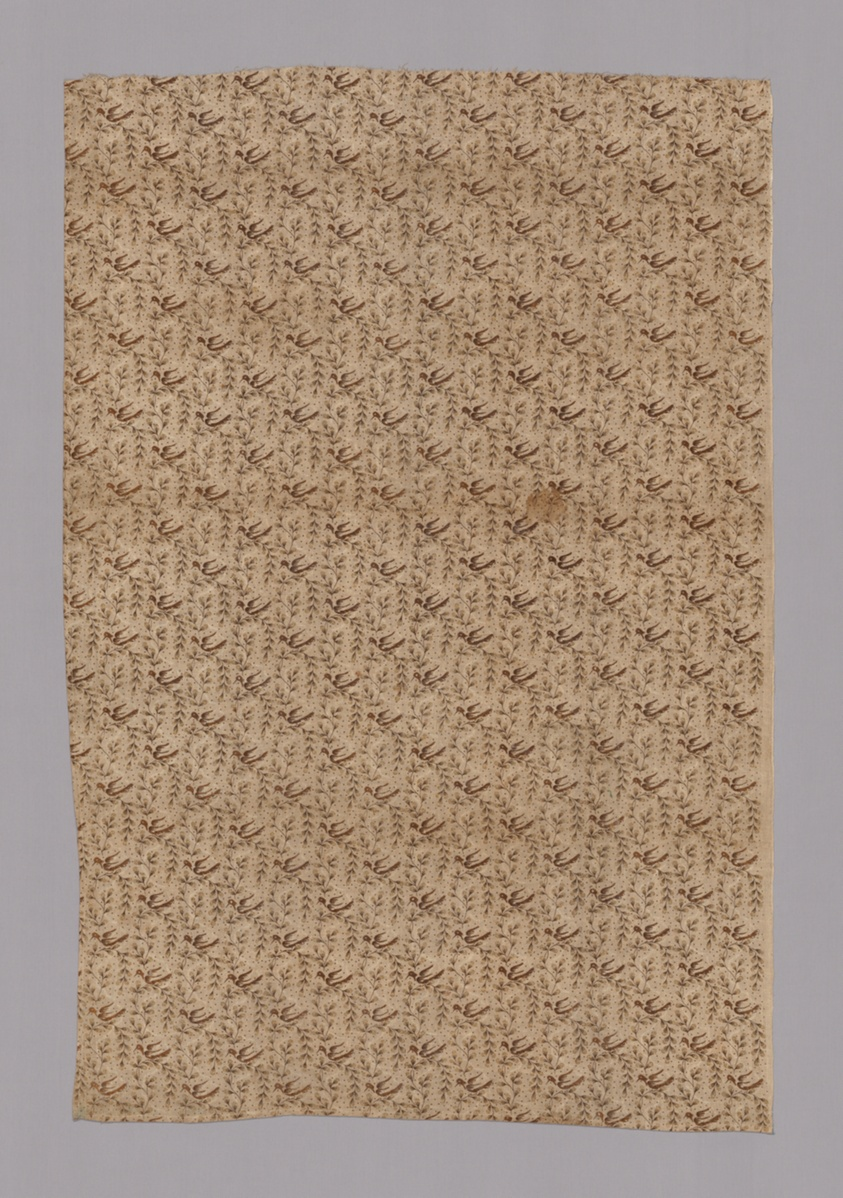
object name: Textile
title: Panel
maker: Portugal or Spain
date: 18th century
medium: Cotton, balanced plain weave; wood block printed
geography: Portugal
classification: textile; weaving - printed